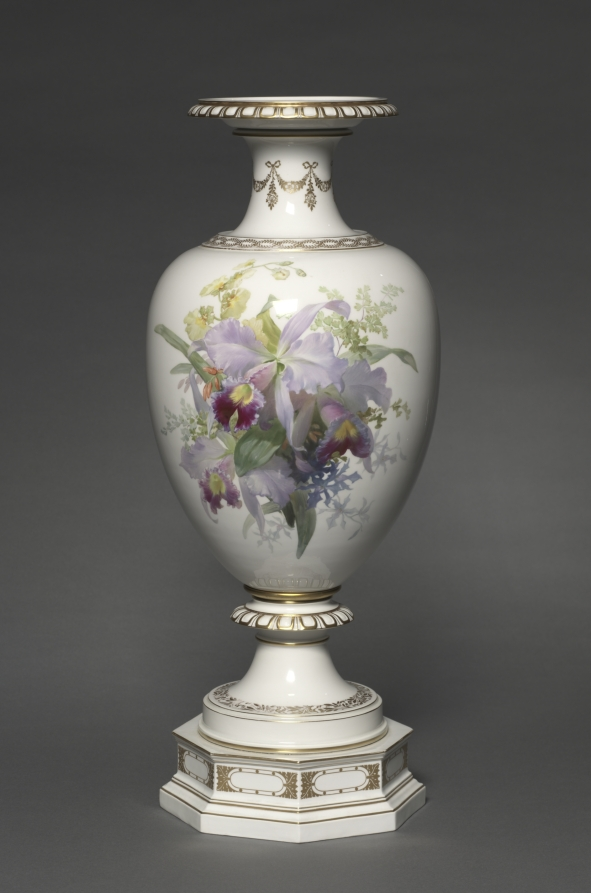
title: Vase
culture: Germany, 20th century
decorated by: Carl Bonnenfaut (German)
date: 1910 (probably)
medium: porcelain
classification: Ceramic